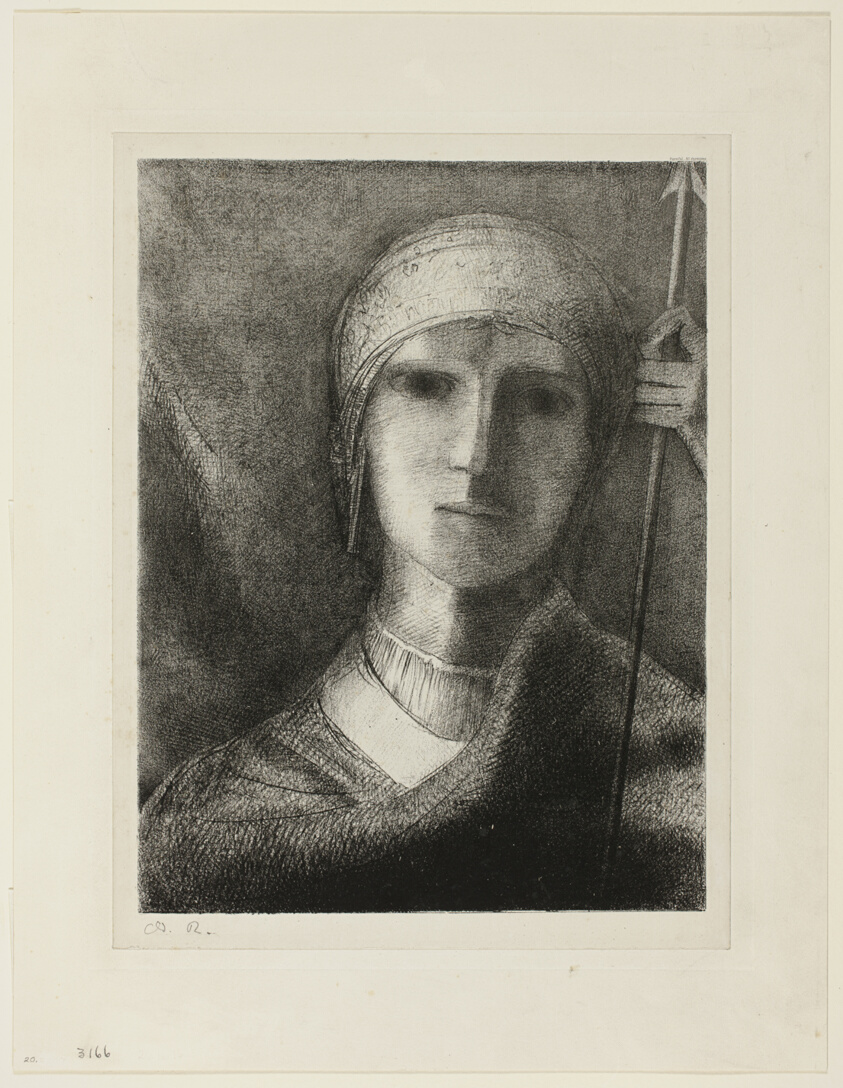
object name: Print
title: Parsifal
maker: Odilon Redon (French, 1840-1916)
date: 1892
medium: Lithograph in black on ivory China paper laid down on ivory wove paper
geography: France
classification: lithograph; print; prints and drawing; paper